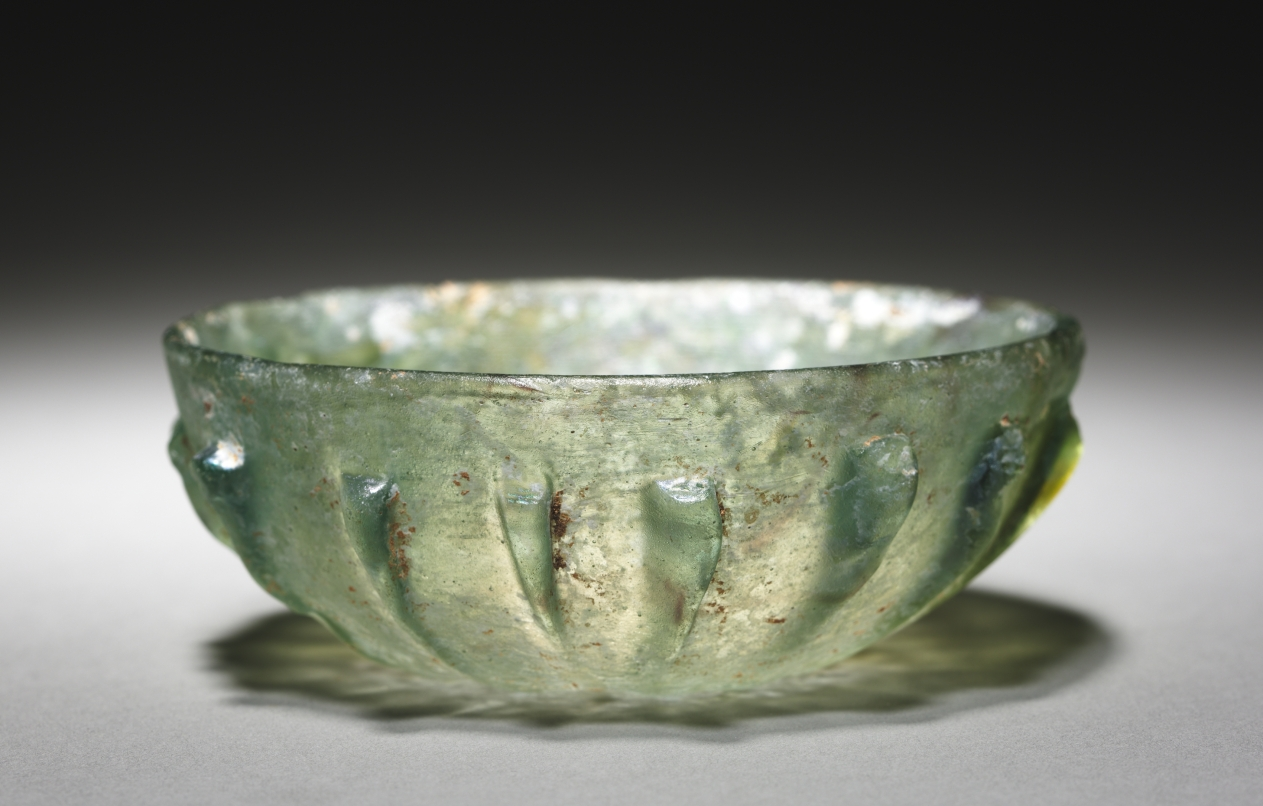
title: Shallow Ribbed Bowl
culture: Roman, Eastern Mediterranean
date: 50 BCE–100 CE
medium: glass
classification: Glass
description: Shallow ribbed glass bowls are a fairly common ancient glass vessel type, likely made by blowing or pressing molten glass into molds. After cooling, an artisan would rotate the bowl on a wheel or lathe, using a gentle abrasive to smooth out imperfections.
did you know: Although this bowl was probably mold-made, several of its unevenly formed ribs show pincer marks.